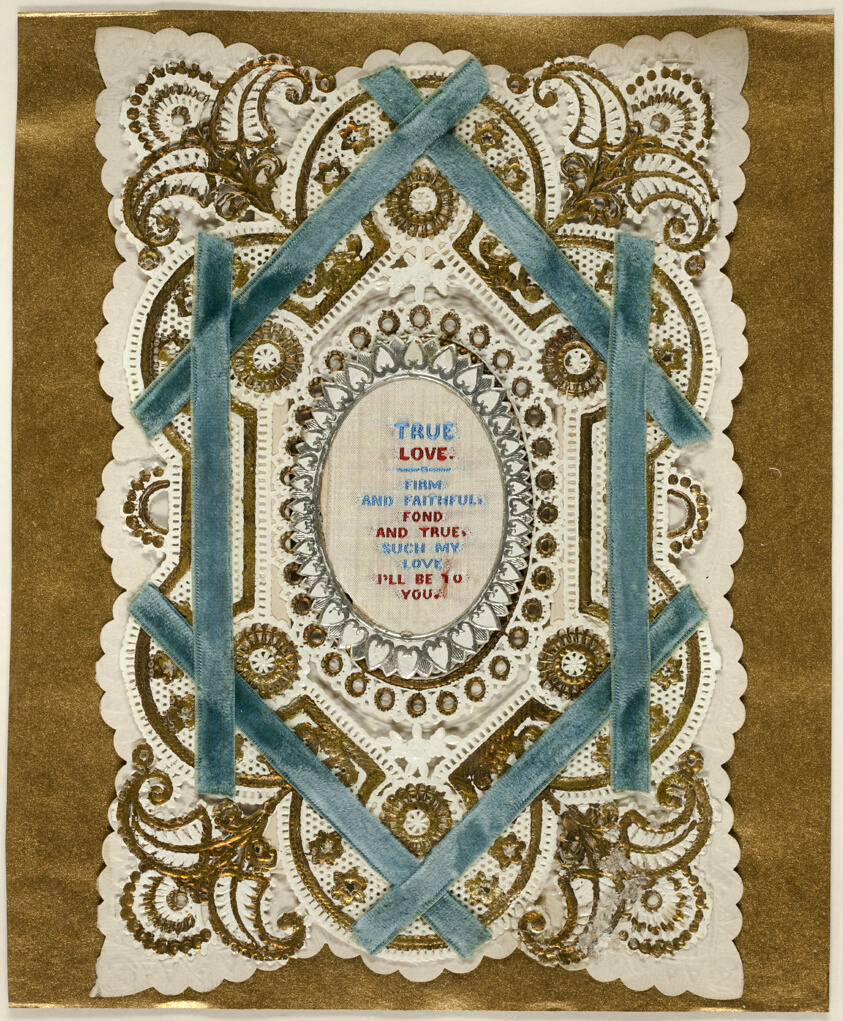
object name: Drawing and Watercolor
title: True Love (Valentine)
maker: Unknown Artist; American, 19th century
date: c. 1881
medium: Collaged elements and gold and silver paint on cut and embossed ivory wove paper, laid down on gold paper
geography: United States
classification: valentine; prints and drawing; paper